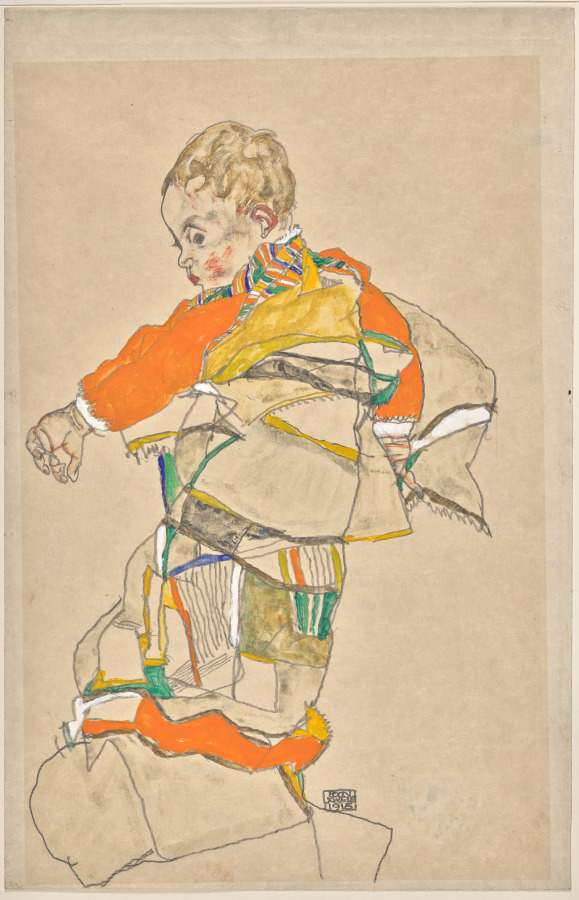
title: Portrait of a Child (Anton Peschka Jr.)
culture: Austria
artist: Egon Schiele (Austrian, 1890–1918)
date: 1916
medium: Gouache, watercolor, and graphite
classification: Drawing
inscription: signed, lower right, in graphite: egon / schiele 1916 [enclosed in a box]; verso, lower right, in graphite: Serena Lederer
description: Egon Schiele depicted a small child, the son of a friend, in this drawing devoid of setting. The child teeters at an awkward angle, seemingly unsupported but for a multipatterned fabric wrap that occupies the artist’s primary interest. This contorted pose is typical of Schiele’s many drawings of people in which he explored the expressive capacity of the human form, often using the body to indicate their psychic state (see another drawing by Schiele nearby). He died in the Spanish influenza epidemic in 1918 at age 28, leaving a vast number of drawings.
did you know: The child seen in this drawing, Anton Peschka Jr., served as a model for several compositions by Egon Schiele.